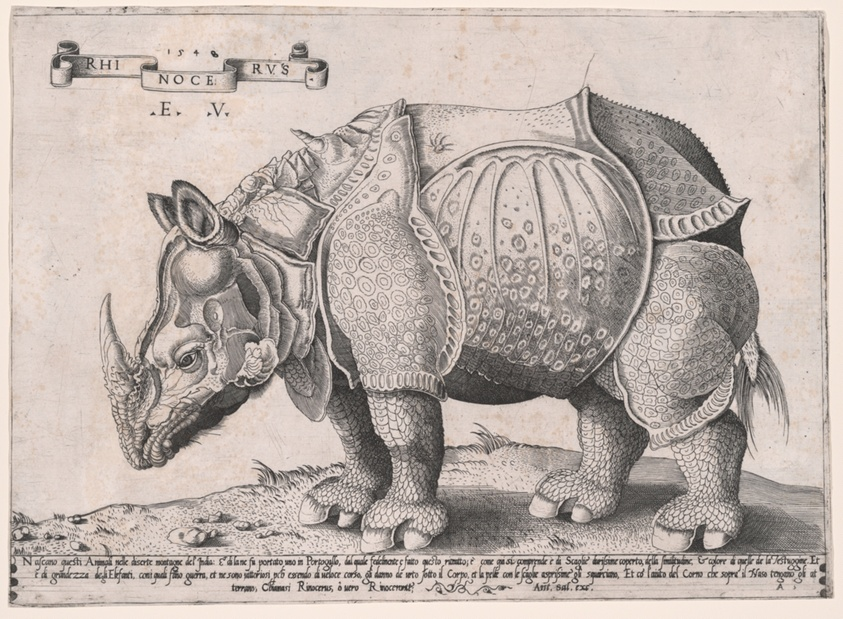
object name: Print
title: Rhinoceros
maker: Enea Vico (Italian, 1523–1567); after Albrecht Dürer (German, 1471–1528)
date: 1542, printed c. 1548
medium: Engraving and etching in black on ivory laid paper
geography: Italy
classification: prints and drawing; paper; print; etching; engraving